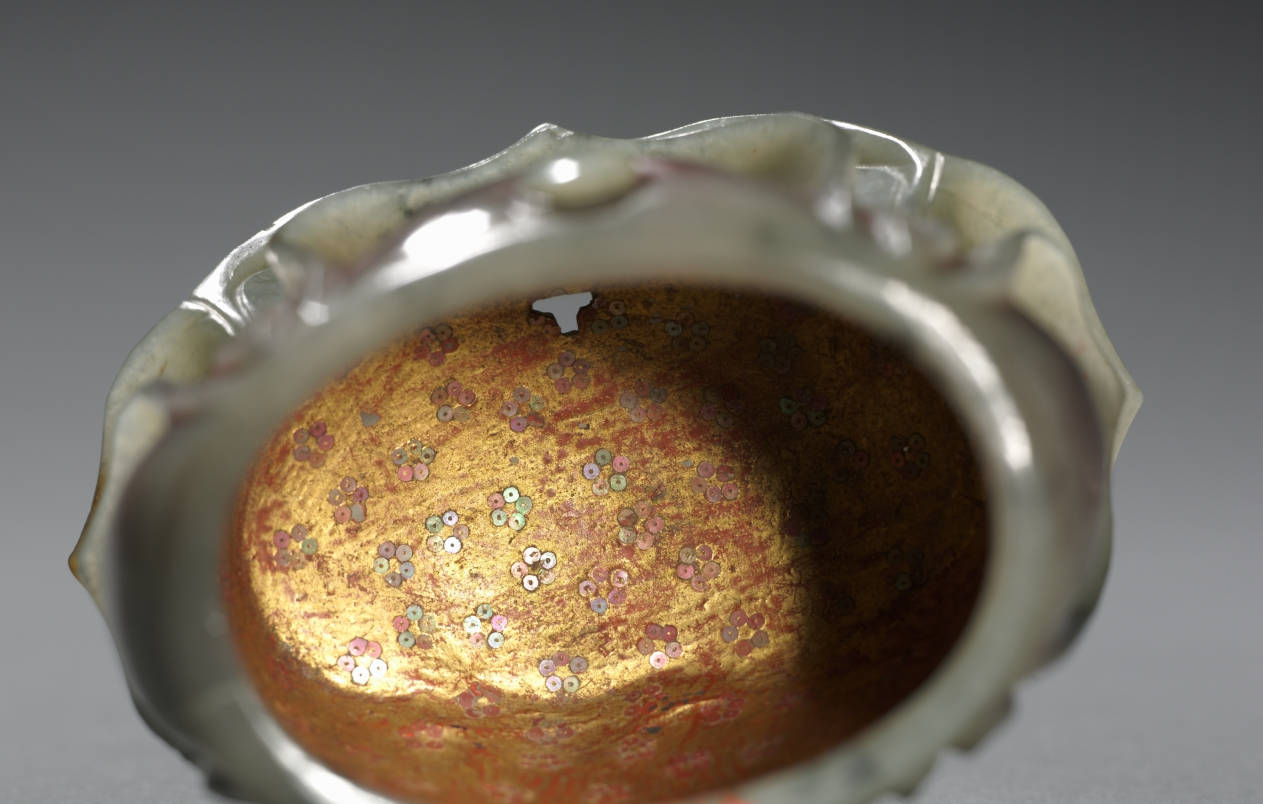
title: Daoist Cap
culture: China, Song dynasty (960-1279) - Yuan dynasty (1271-1368)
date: 960–1279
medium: grayish-green jade with brown and black markings; interior with pink pigment and gold inlays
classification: Jade